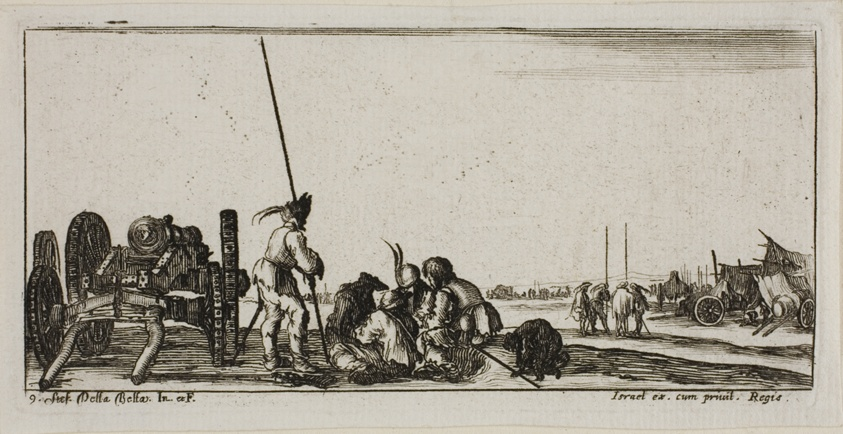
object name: Print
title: Plate Nine from Drawings of Several Movements by Soldiers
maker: Stefano della Bella (Italian, 1610-1664)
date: 1644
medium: Etching on ivory laid paper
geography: Italy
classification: etching; paper; print; prints and drawing